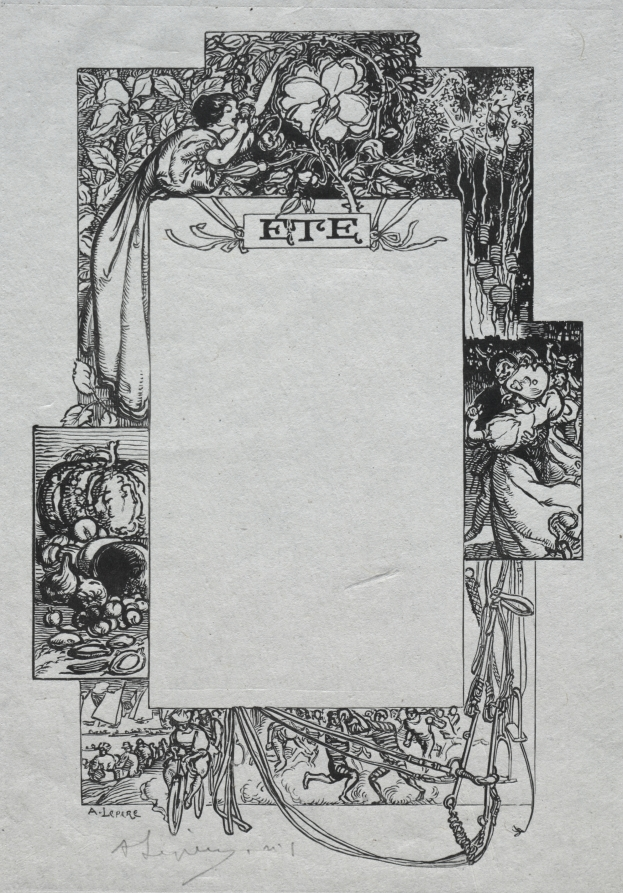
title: Paris Almanac, 1897: Decorative Border, Summer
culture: France, late 19th Century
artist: Auguste Louis Lepère (French, 1849–1918)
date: 1897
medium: wood engraving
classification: Print